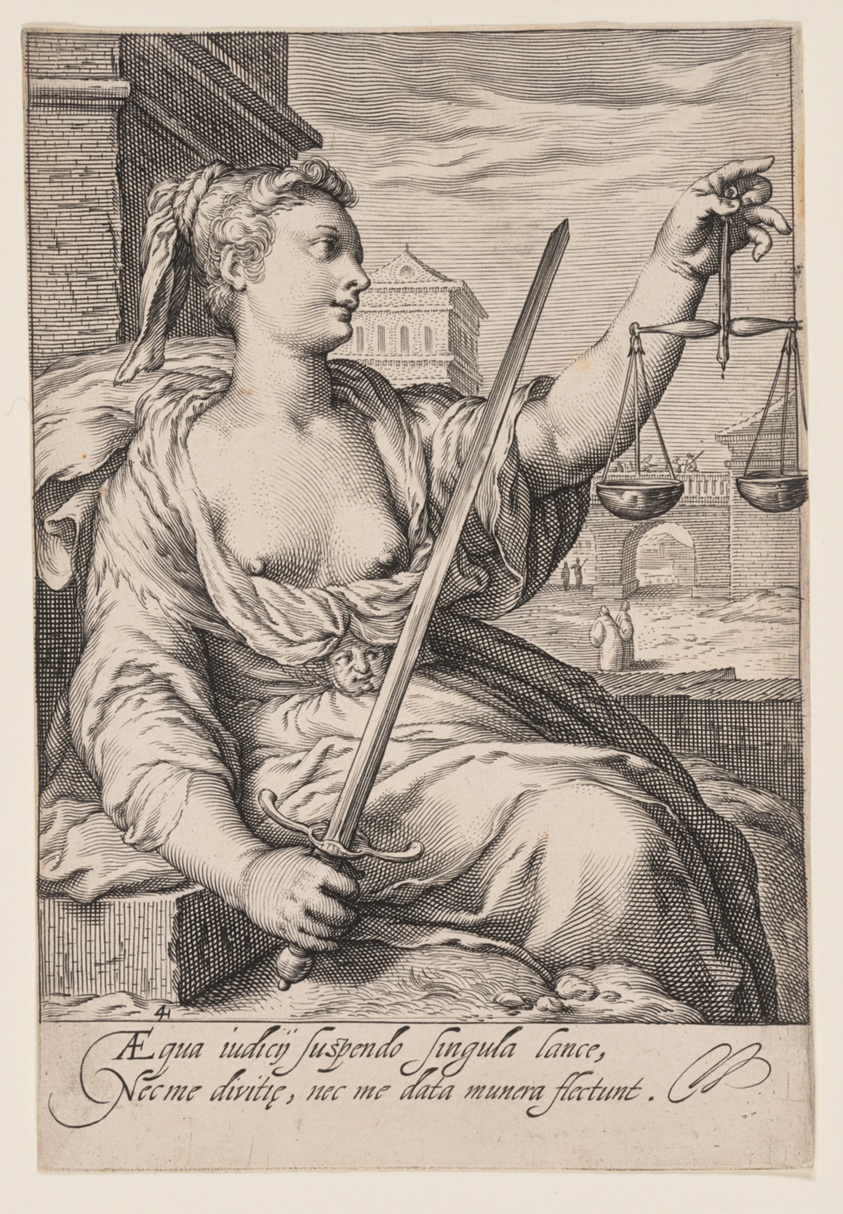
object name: Print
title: Justice, from The Seven Virtues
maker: Jacob Matham (Dutch, 1571–1631); after Hendrick Goltzius (Dutch, 1558–1617)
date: 1597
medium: Engraving on paper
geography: Netherlands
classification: engraving; paper; print; prints and drawing